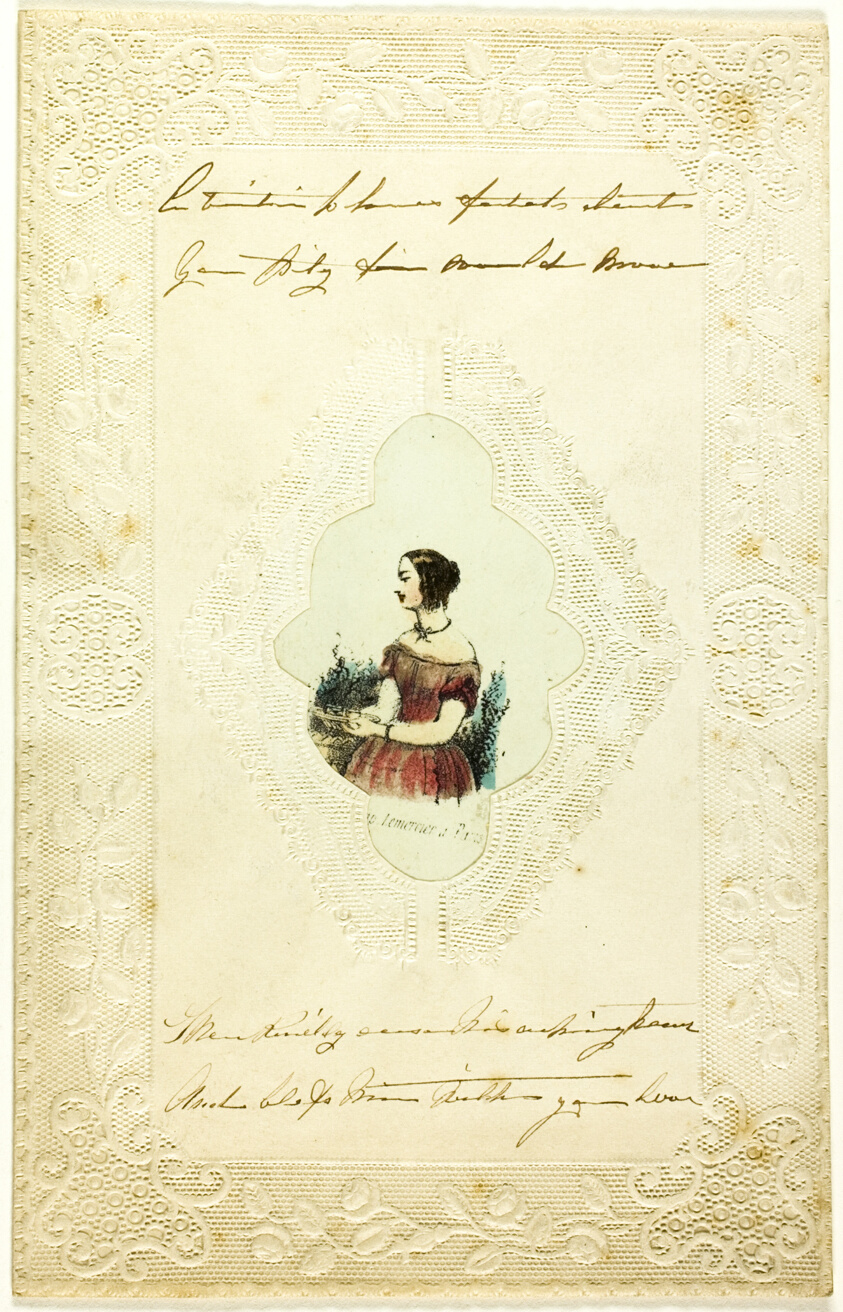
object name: Print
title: Untitled Valentine (Woman in Pink Dress)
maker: Unknown Artist (English, 19th century); printed by Lemercier et Compagnie (French, founded 1825/28)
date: c. 1840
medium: Lithograph with hand-coloring collaged onto cut and embossed ivory wove paper with pen and brown ink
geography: England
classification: valentine; prints and drawing; print